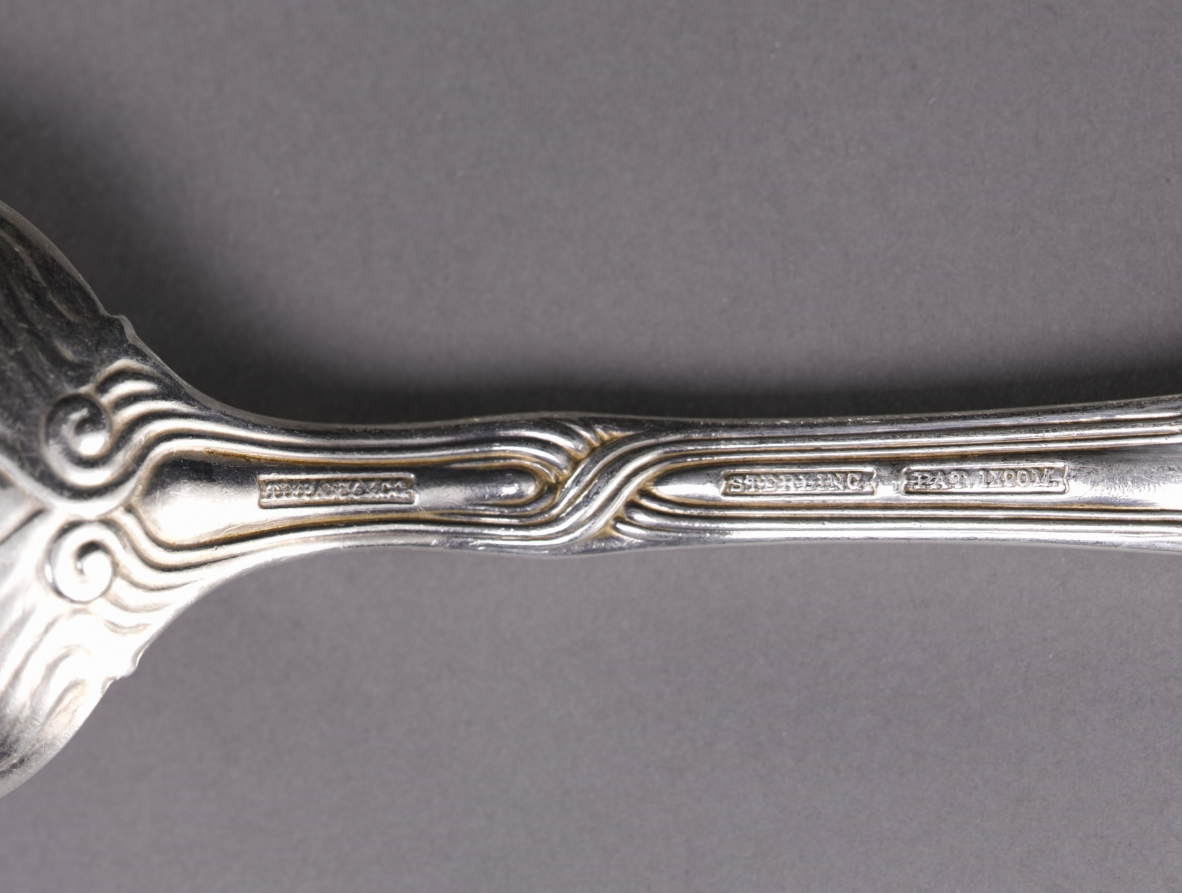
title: Table Spoon (Pattern "Broom Corn")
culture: America, New York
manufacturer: Tiffany & Co. (America, New York, est. 1837)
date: c. 1890–1900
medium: Silver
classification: Silver